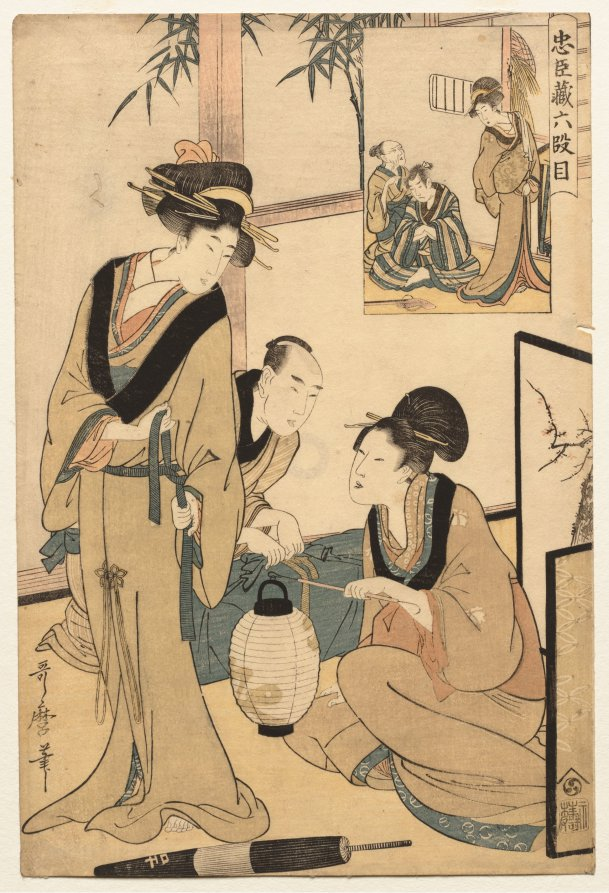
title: Chushingura: Act VI of The Storehouse of Loyalty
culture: Japan, Edo period (1615–1868)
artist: Kitagawa Utamaro (Japanese, c. 1754–1806)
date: late 1790s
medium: color woodblock print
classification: Print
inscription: Signature: Utamaro hitsu Publisher: Nishimuraya Yohachi (Eiju han, emblem)